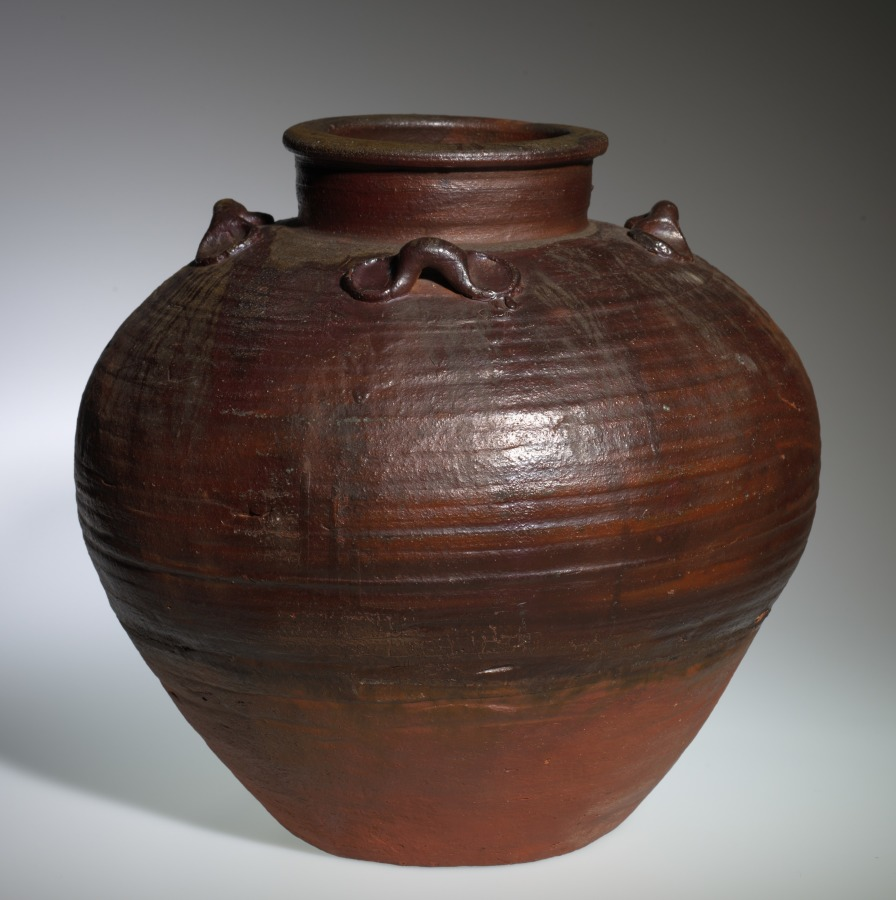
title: Tea Storage Jar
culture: Japan, Momoyama period (1573–1615)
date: c. 1600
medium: Stoneware with natural ash glaze and fire mark (hidasuki) decoration (Bizen ware)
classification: Ceramic